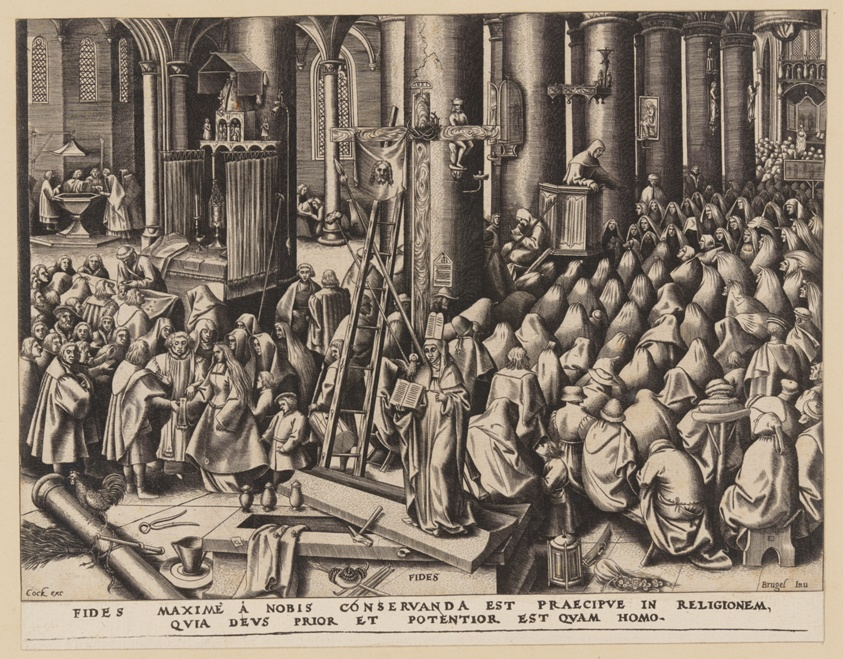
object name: Print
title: Faith, from The Seven Virtues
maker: Philip Galle (Flemish, 1537–1612); after Pieter Bruegel, the elder (Flemish, c. 1525–1569); published by Hieronymus Cock (Netherlandish, c. 1510–1570)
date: 1559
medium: Engraving on ivory laid paper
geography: Flanders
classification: engraving; paper; print; prints and drawing